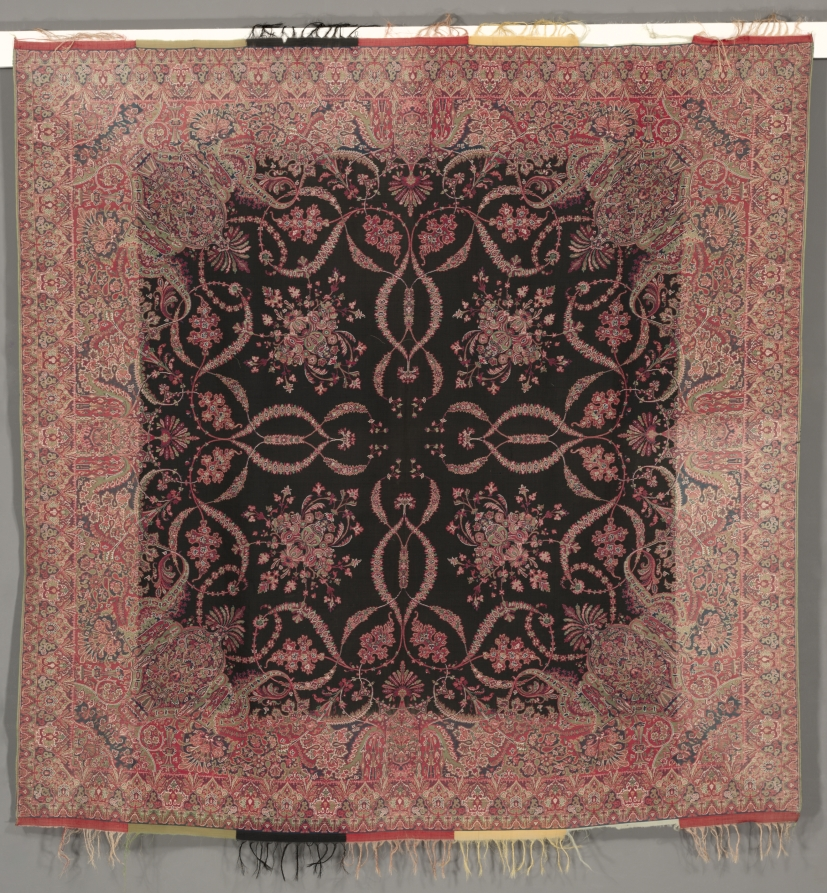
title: Square Shawl in Renaissance Style with Black Center and Quarter Shawl Layout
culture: France, Nimes; Scotland, Paisley or England, Norwich, 19th century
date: 1840s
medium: supplementary weft pattern; silk and cotton?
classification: Textile